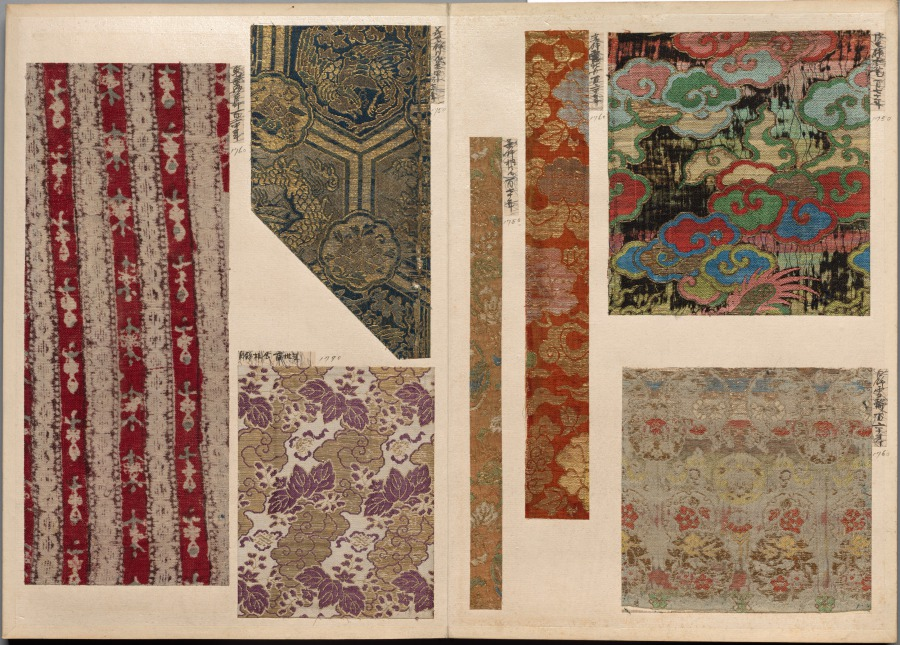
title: Album of Textile Samples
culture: Japan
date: 1790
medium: silk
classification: Textile